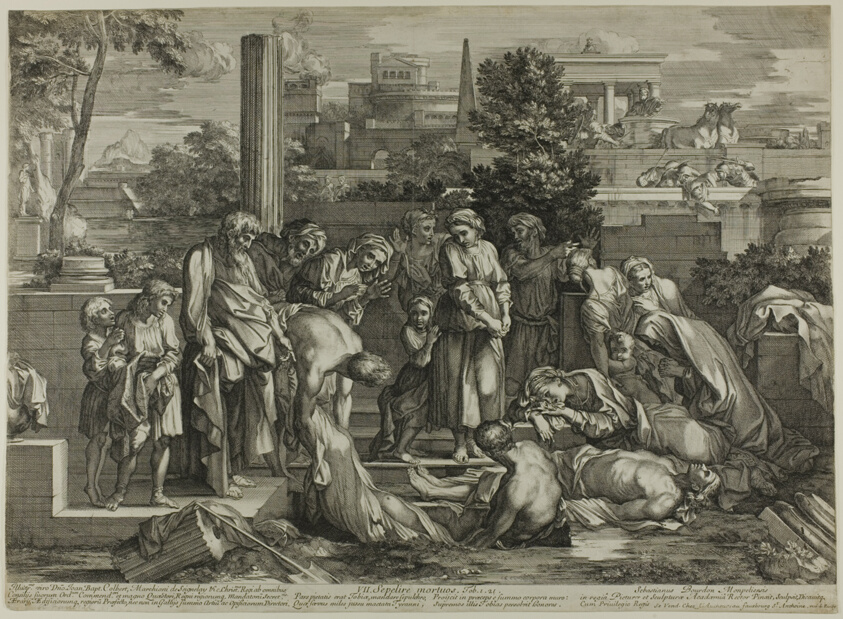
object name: Print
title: To Bury the Dead, from The Works of Mercy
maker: Sébastien Bourdon (French, 1616-1671)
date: 1656–57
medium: Engraving in black on cream laid paper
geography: France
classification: engraving; print; prints and drawing